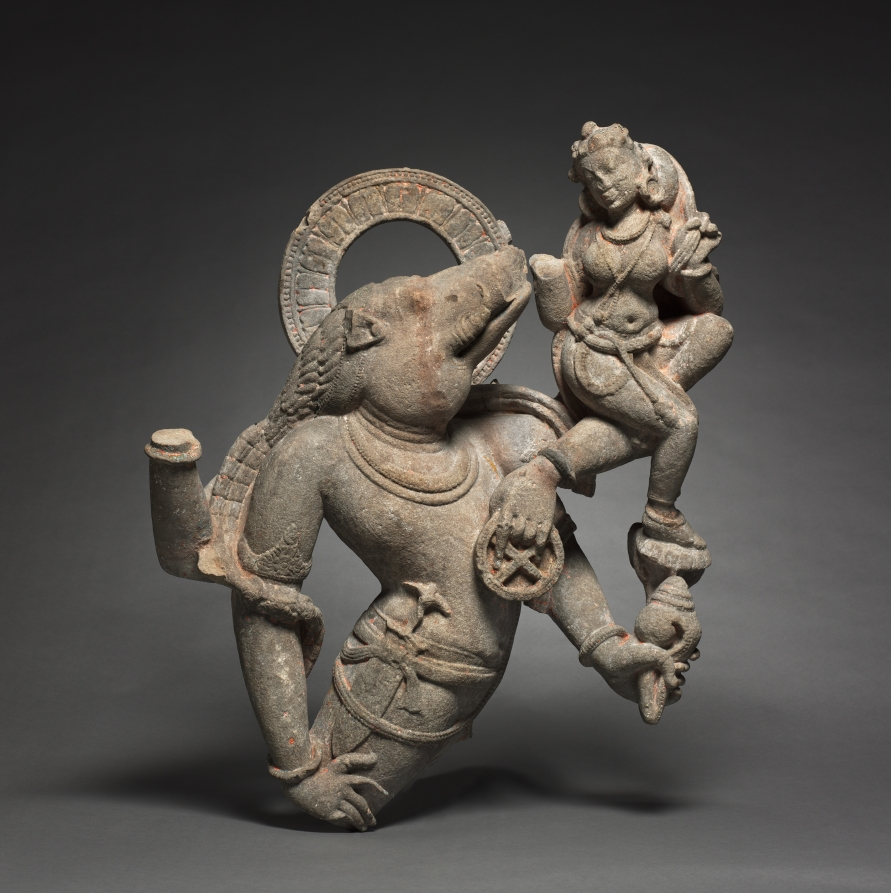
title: Varaha, Boar Incarnation of Vishnu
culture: Central India, probably Madhya Pradesh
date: 700–800s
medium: sandstone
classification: Stone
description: The Hindu god Vishnu took the form of a boar to rescue his wife Bhu (Earth in Sanskrit) from the bottom of the primordial ocean, where she had been hidden by a demon. Here shown with the head of a boar and the powerful lunging body of a warrior, Varaha holds out one of his four elbows as a seat for the earth goddess who he has rescued.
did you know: In his two left hands, he hold the conch and discus.